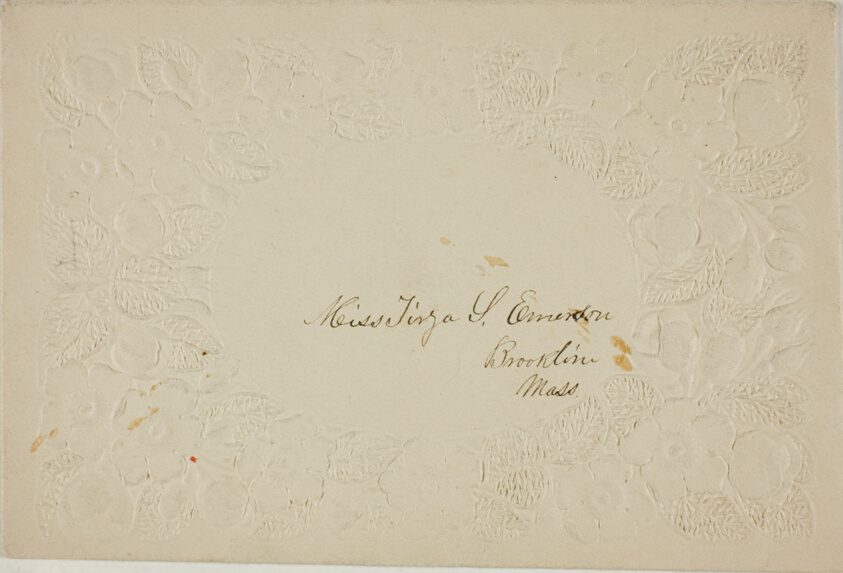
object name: Print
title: Valentine envelope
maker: Unknown Artist; English, 19th century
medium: Pen and black ink on embossed cream wove paper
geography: England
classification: valentine; prints and drawing; print